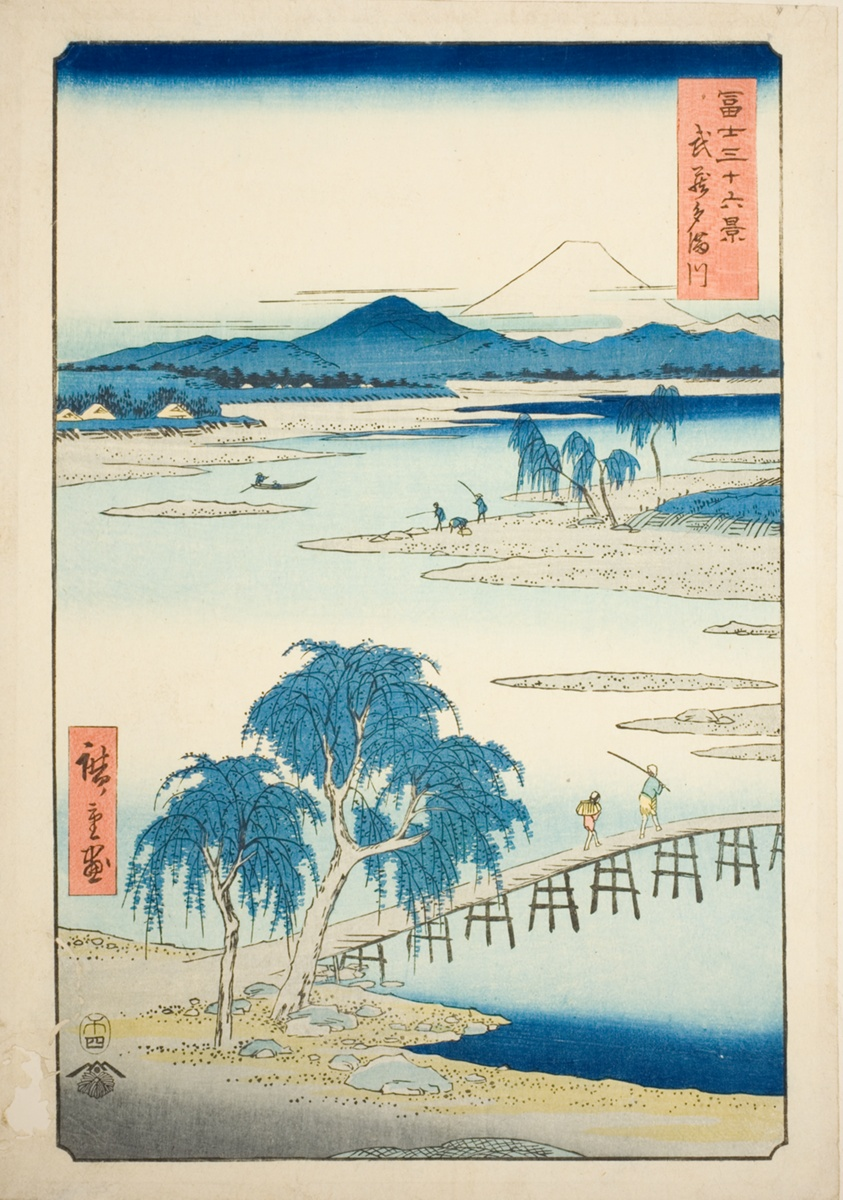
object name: Print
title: Tama River in Musashi Province (Musashi Tamagawa), from the series "Thirty-six Views of Mount Fuji (Fuji sanjurokkei)"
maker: Utagawa Hiroshige 歌川 広重; Japanese, 1797-1858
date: 1858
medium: Color woodblock print; oban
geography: Japan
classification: woodblock print; print; asian art